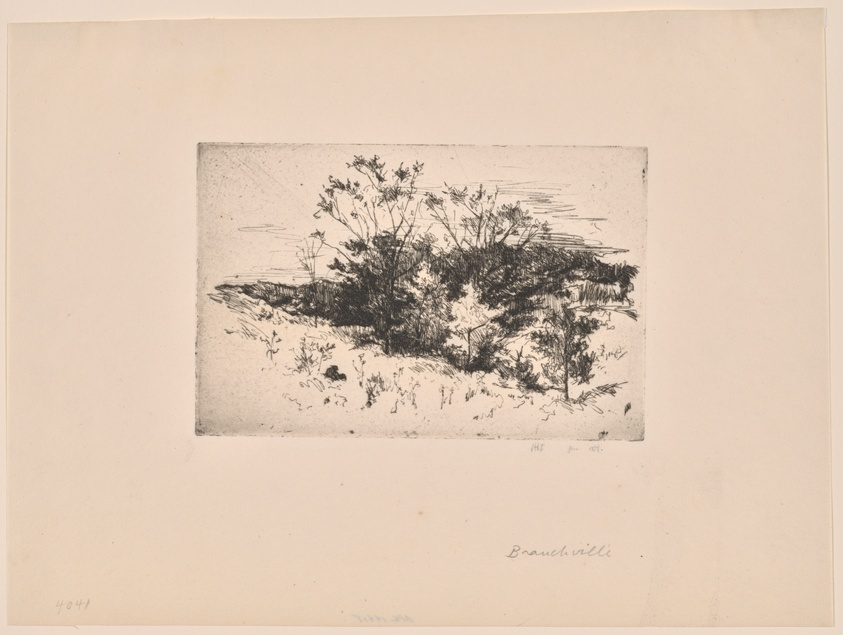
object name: Print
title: Autumn Landscape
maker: John Henry Twachtman (American, 1853-1902)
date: 1879–80, printed 1921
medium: Etching in black on cream wove paper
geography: United States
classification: prints and drawing; paper; print; etching